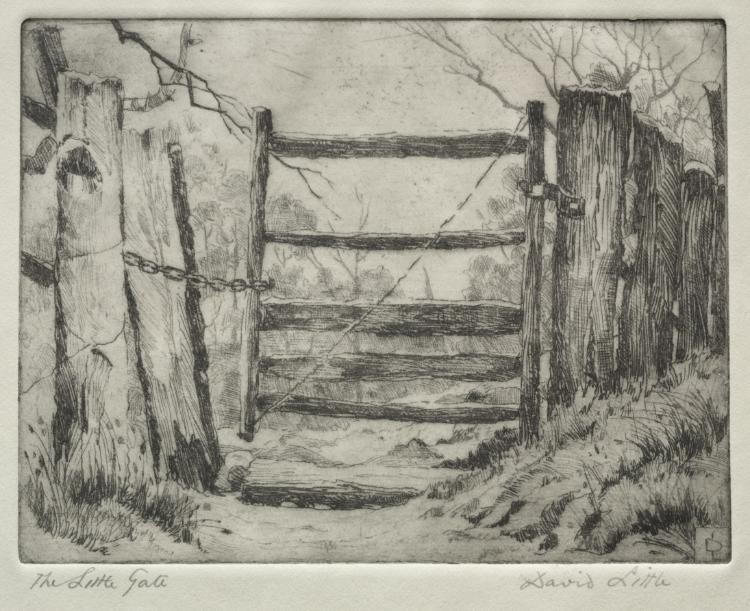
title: The Little Gate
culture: England, 20th century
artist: David Little (Australian, 1893–1951)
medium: etching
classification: Print